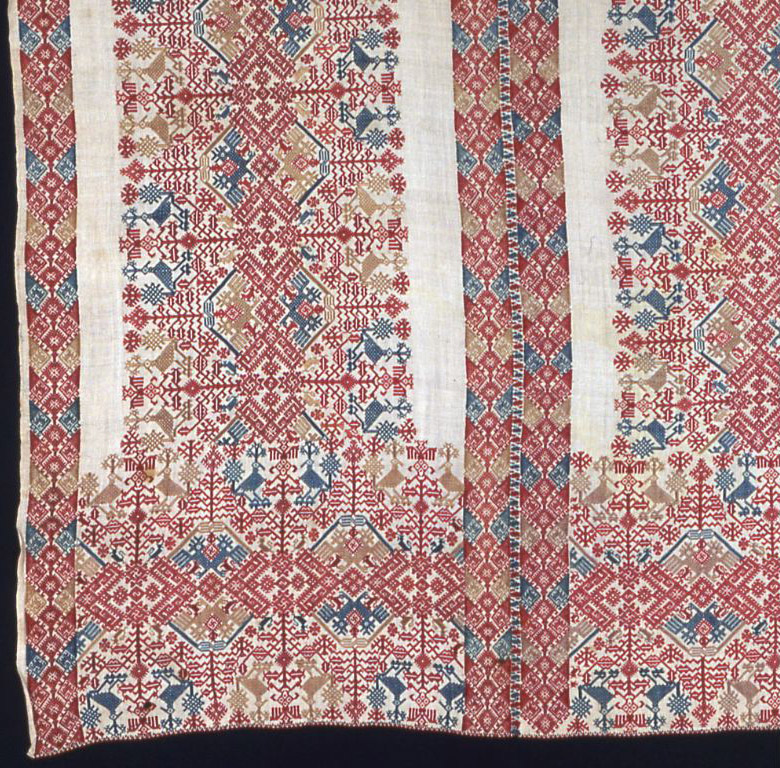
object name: Textile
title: Bed Curtain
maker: Greece, Dodecanese Islands, Patmos, or Cyclades Islands, Pholegandros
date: 1700/1900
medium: Linen, plain weave; embroidered with silk in buttonhole, double running, running (pattern darning), satin, or stem stitches; joined by silk, needle-made inserts of oblique interlacing; four loom widths joined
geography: Greece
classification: textile; needlework (visual works)